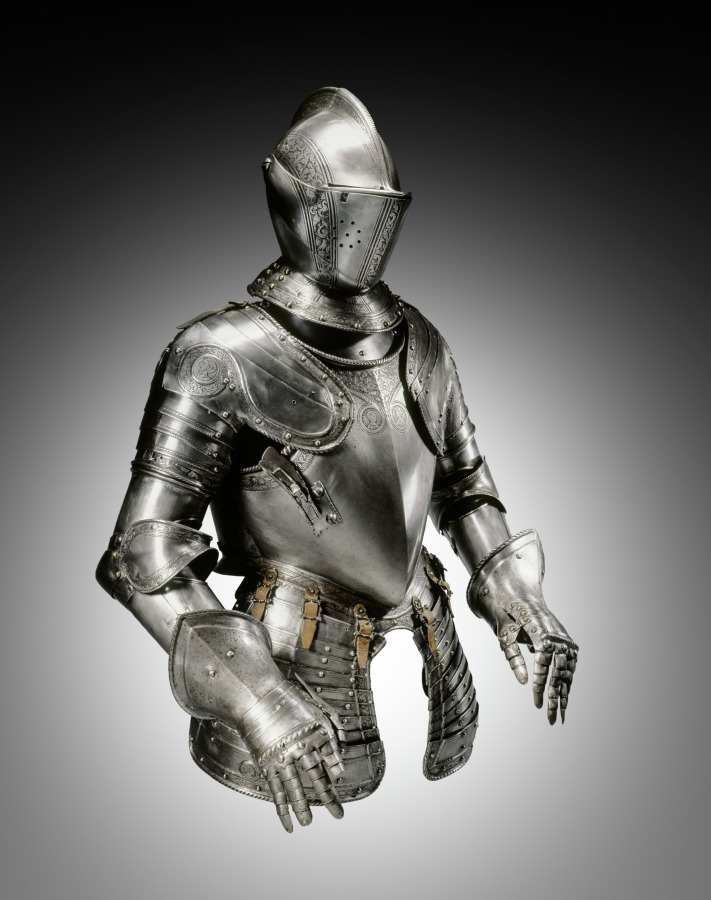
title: Half-Suit of Armor for the Field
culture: North Italy, Brescia (?), 16th century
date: c. 1575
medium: steel with etched decorative bands and roundels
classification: Arms and Armor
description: Decoration was critical to fine armor, and etching was the most commonly used technique. Here, the bands along the borders are etched. On the breastplate, pauldrons (shoulder guards), and tassets (hip and upper leg guards), etched medallions enclose profile busts reminiscent of ancient Roman portraits. The lance rest on the breastplate indicates that this half-suit was once part of a complete field armor for man and horse. The etching technique used for armor was developed in the late 1400s. The metal surface was first coated with an acid-resistant substance, such as wax or varnish. An etching needle was then used to scratch a design into the surface. The exposed areas were then treated with an acid that would "bite" or etch the lines into the metal. When the coating was removed, the etched design was blackened for contrast.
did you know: This is an example of raised field etching where the design stands out in slight relief from the background.